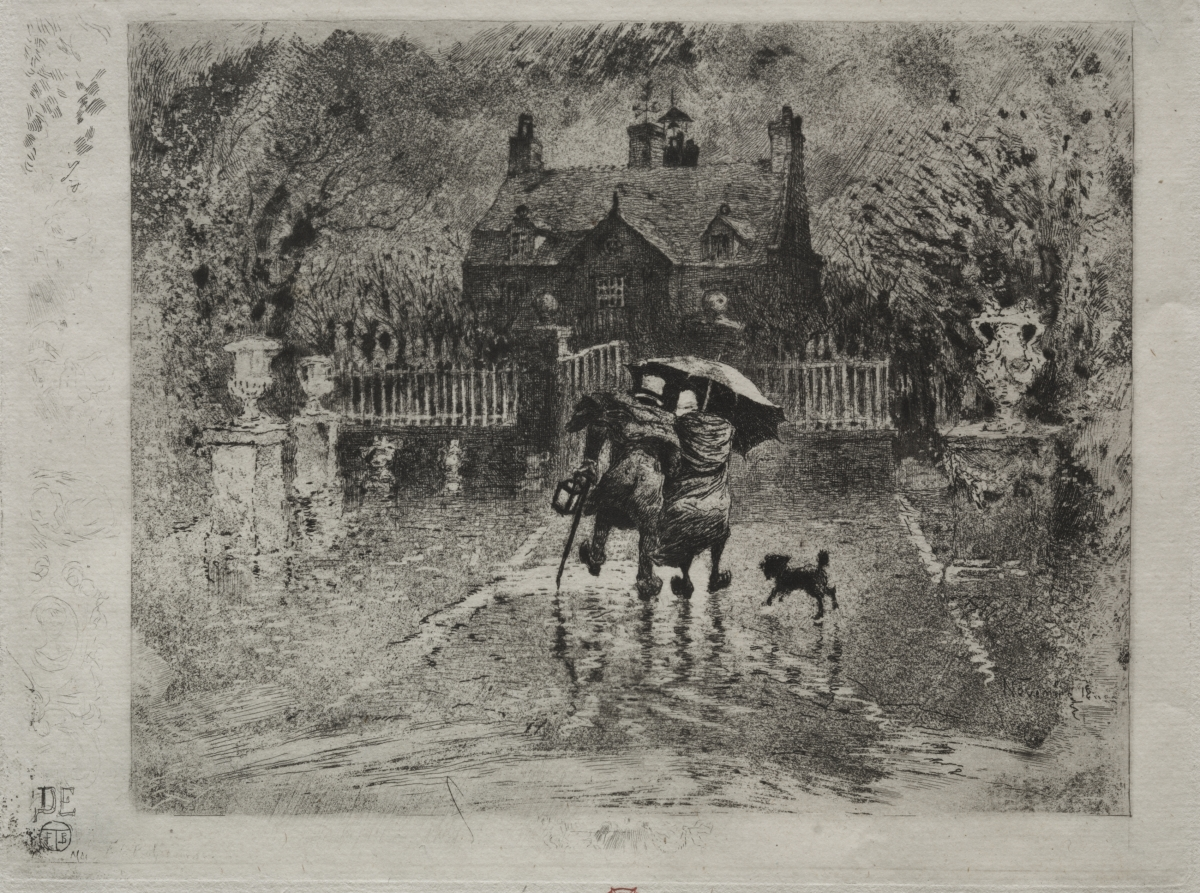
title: The Country Neighbors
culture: France, 19th century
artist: Félix Hilaire Buhot (French, 1847–1898)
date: 1879–1880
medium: etching, drypoint and aquatint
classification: Print